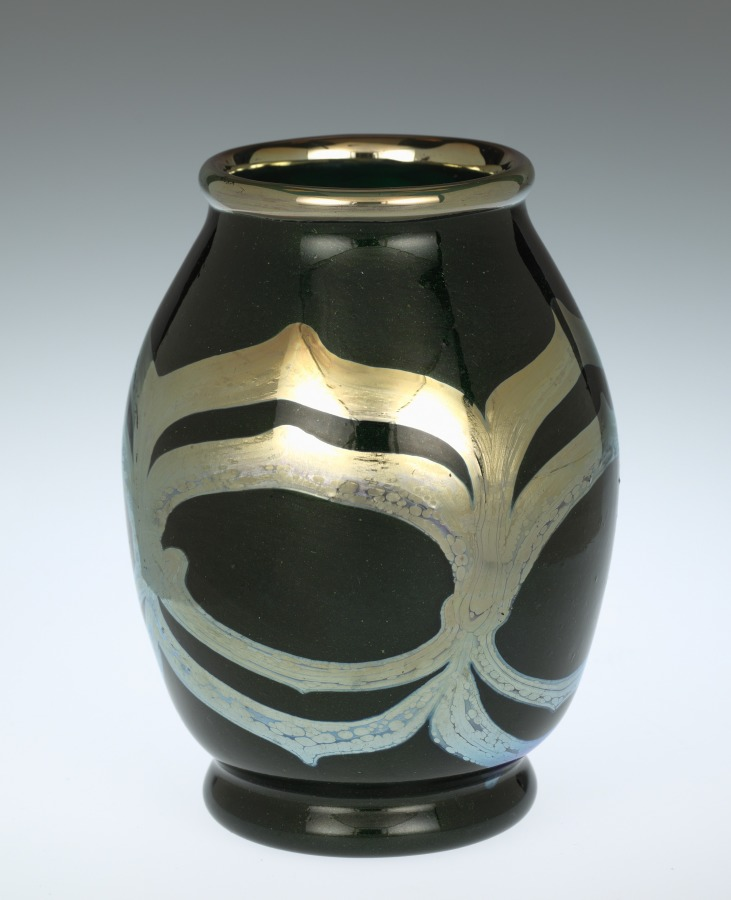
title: Vase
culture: America, New York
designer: Louis Comfort Tiffany (American, 1848–1933)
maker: Tiffany Glass & Decorating Company (America, New York, 1892–1902)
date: 1893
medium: Favrile glass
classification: Glass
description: This small vase is made of Louis Comfort Tiffany's signature Favrile glass. Early on when Tiffany began collaborating with glass artists on new types of production, his aesthetic ambitions were realized in the development of Favrile glass, deliberately named to sound French, expensive, and “handmade.” Largely through Tiffany's marketing ability, Favrile glass became America’s greatest contribution to the Art Nouveau style. His works were exhibited at international expositions; galleries in major European cities, where his creations were bought by many museums; and in his store in Manhattan, known as the Tiffany Glass and Decorating Co., later Tiffany Studios. Along with the many shapes and sizes of his decorative vases, Tiffany used Favrile glass in mosaic panels, stained glass windows, and his artistic line of table and floor lamps.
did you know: Introducing various chemicals into the molten glass within the furnace produced multicolored iridescence on the surface when this vase was blown and cooled.